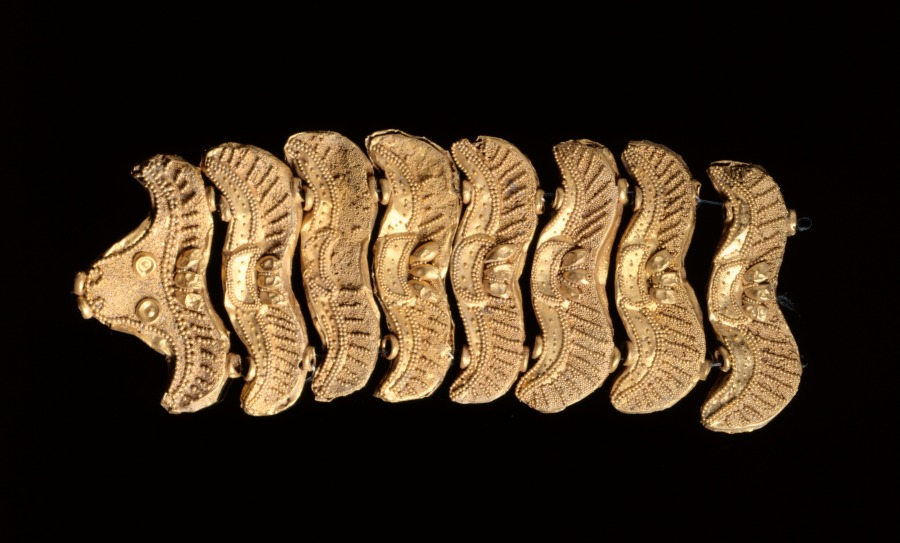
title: Set of Pendants Ending in a Bull's Head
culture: India, Shunga period (185–78 BCE)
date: 185–72 BCE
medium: gold repoussé with granulation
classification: Jewelry